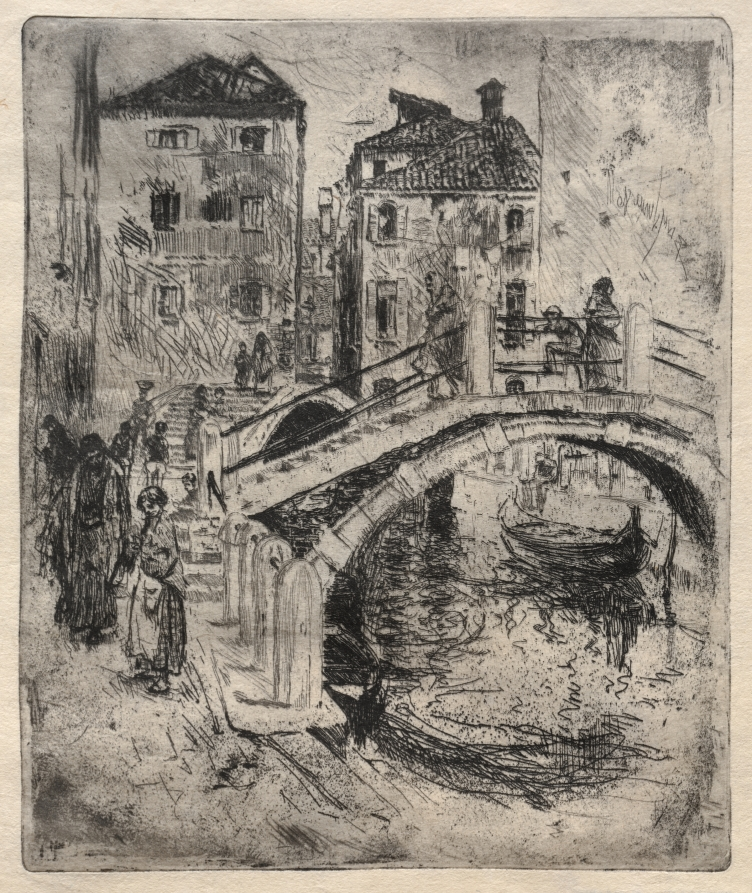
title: Venetian Canal and Bridges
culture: America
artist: Robert Frederick Blum (American, 1857–1903)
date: 1886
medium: etching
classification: Print